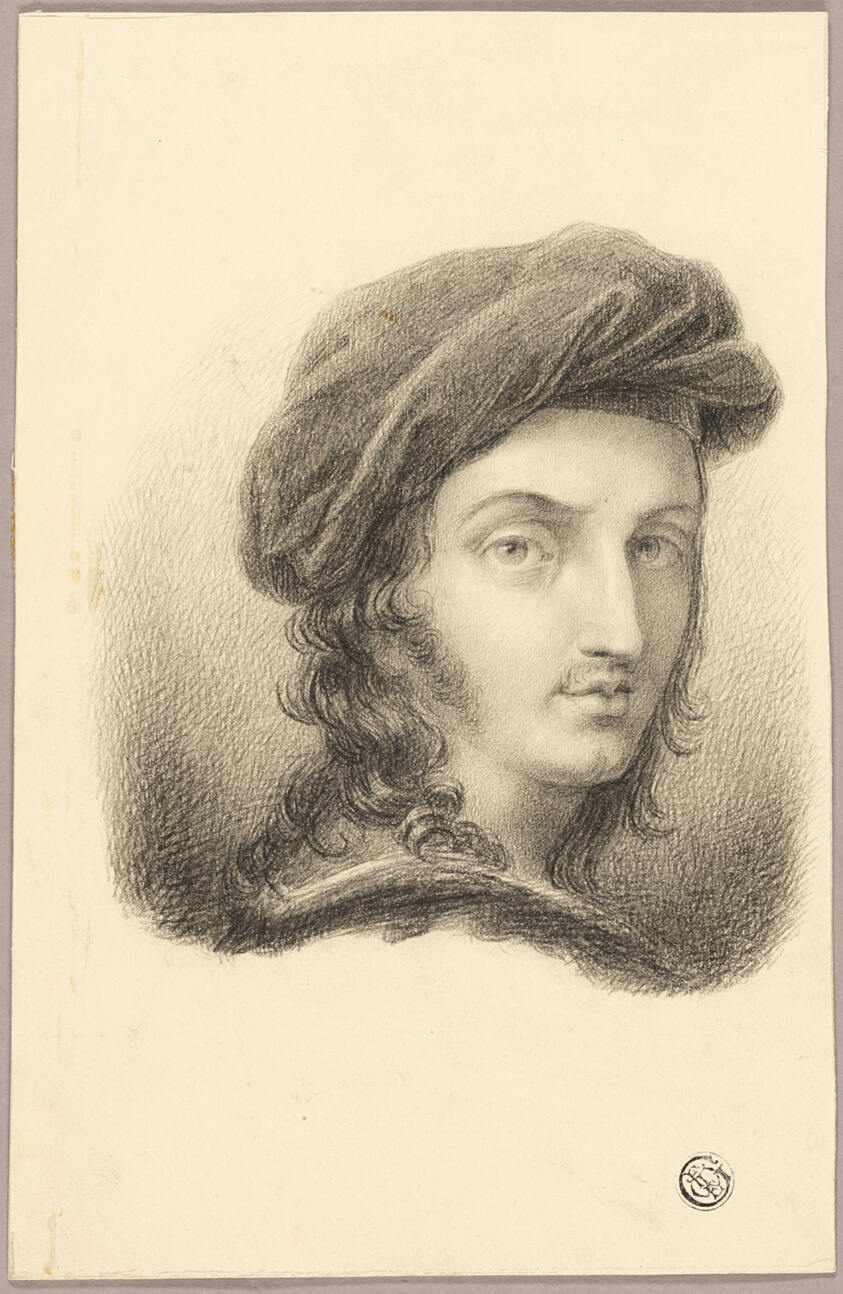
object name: Drawing and Watercolor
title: Raphael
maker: After Raffaello Sanzio, called Raphael; Italian, 1483-1520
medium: Charcoal, on cream wove card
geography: Italy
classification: charcoal; drawings (visual works); prints and drawing